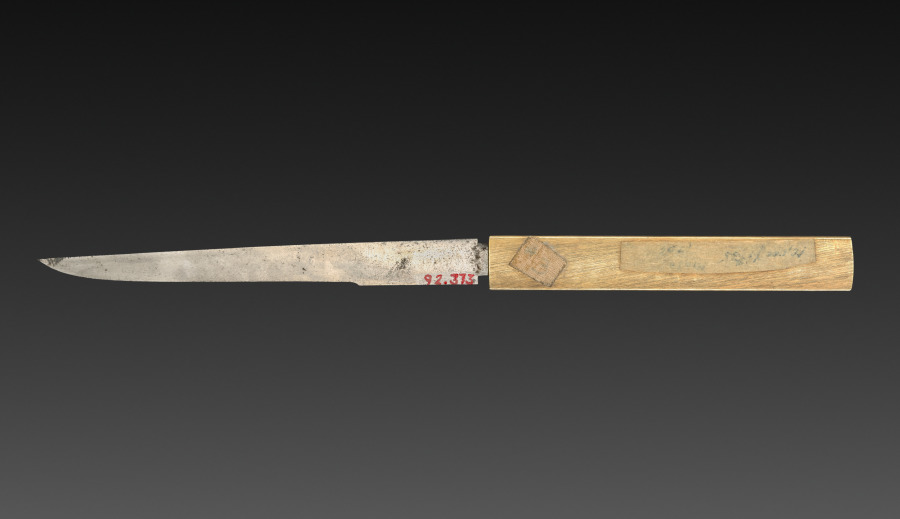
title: Knife with Handle (Kozuka) with Mandarin Ducks in Plum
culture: Japan, Edo period (1615–1868)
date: 1615–1868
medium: metal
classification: Metalwork